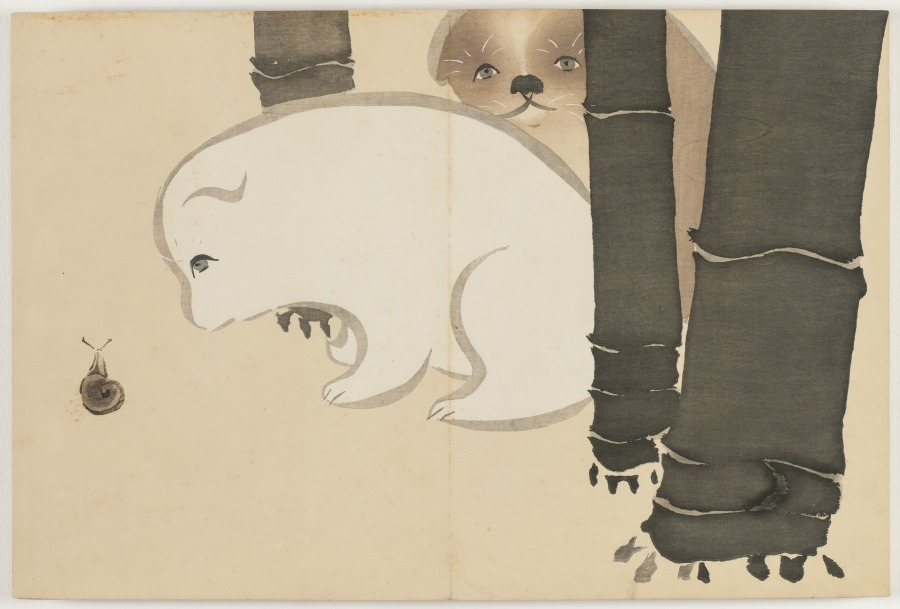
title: Flowers of a Hundred Worlds (Momoyogusa): Puppies (Enokoro)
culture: Japan, Meiji period (1868–1912)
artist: Kamisaka Sekka (Japanese, 1866–1942)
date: 1909–10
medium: color woodcuts with gold and silver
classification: Bound Volume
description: This print from a set of three woodblock printed albums displays the graphic design prowess of Kamisaka Sekka. The images were first distributed one by one to subscribers to the series but later were reissued in bound form, like this book, for mass consumers. Each print features a vignette taken from nature or Japanese literature. Many of the scenes have a long history in Japan, originating in the 900s or 1000s and having been interpreted by all manner of artists since that time. Sekka’s selections hew closely to precedents from the Rinpa style originated by painter Tawaraya Sōtatsu (c. 1570–c. 1640) and calligrapher Hon’ami Kōetsu (1558–1637).